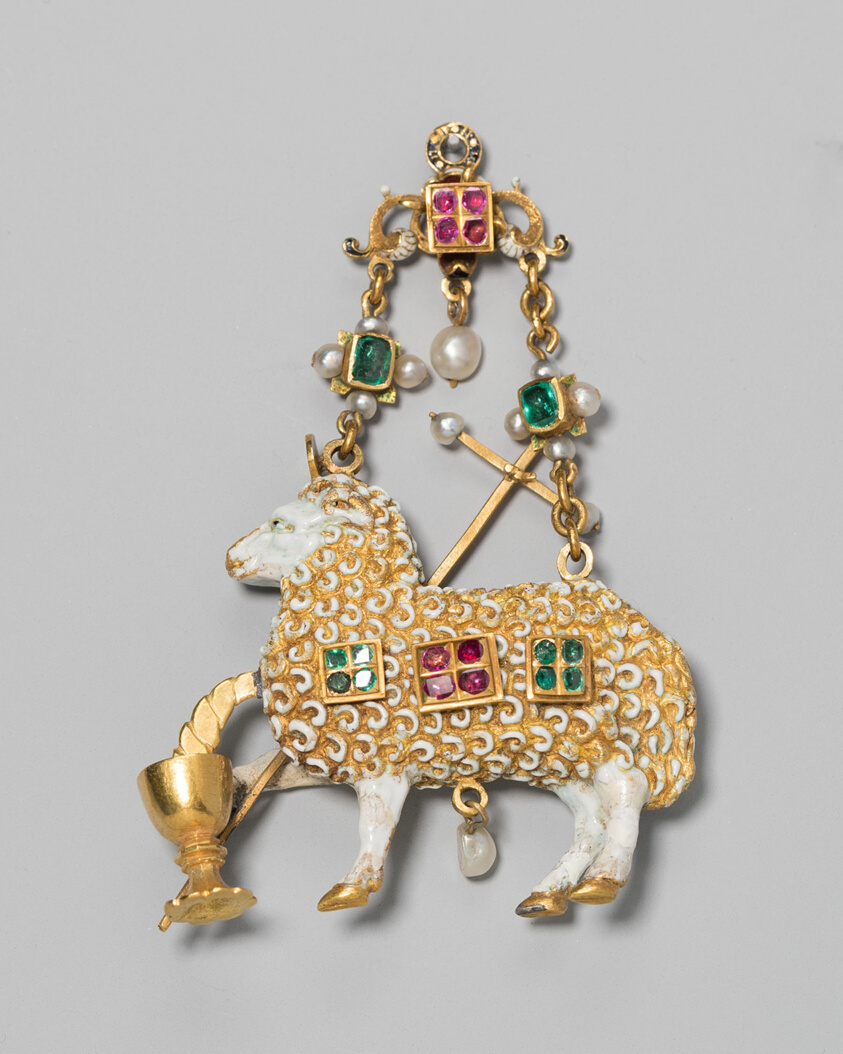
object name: Costume and Accessories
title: Pendant with Agnus Dei (Lamb of God)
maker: Spanish or Spanish Colonial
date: c. 1575-c. 1650, with later modifications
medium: Gold, enamel, emeralds, rubies, and pearls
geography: Spain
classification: pendant (jewelry); jewelry; european decorative arts; costume